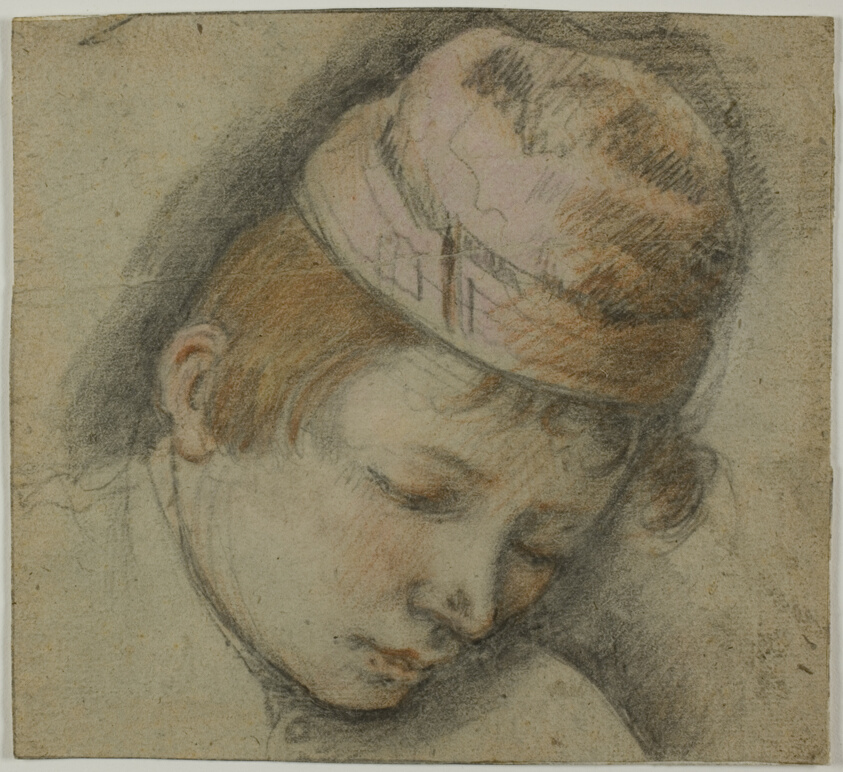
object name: Drawing and Watercolor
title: Head of Youth in a Pink Cap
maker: Follower of Jacopo Bassano (Italian, c. 1510-1592)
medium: Black chalk, with orange and pink chalk, on gray laid paper, laid down on ivory laid paper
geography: Italy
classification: chalk; drawings (visual works); prints and drawing